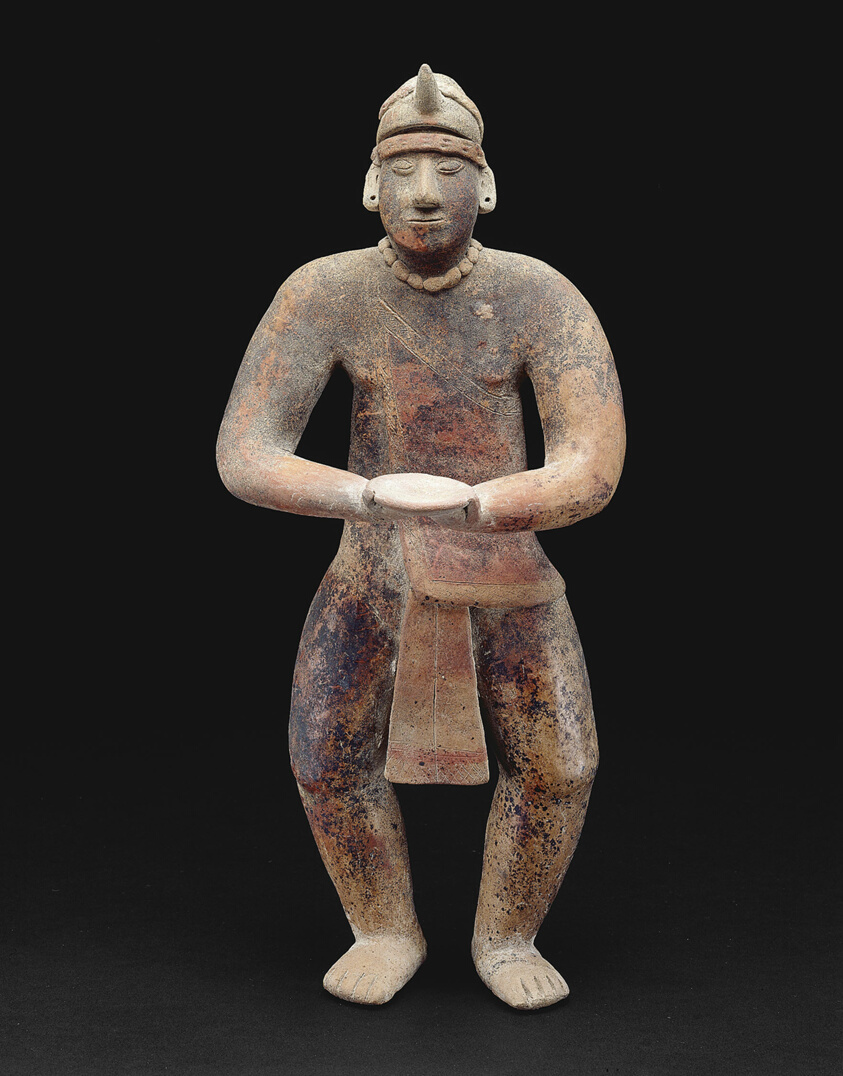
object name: Sculpture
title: Standing Male Figure Holding a Plate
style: colima, mesoamerican, Pre-Columbian, americas, Arts of the Americas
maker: Colima (Colima, Mexico)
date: 100–400 CE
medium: Ceramic and pigment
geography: Colima state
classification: earthenware; ceramics; sculpture; art of the americas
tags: people